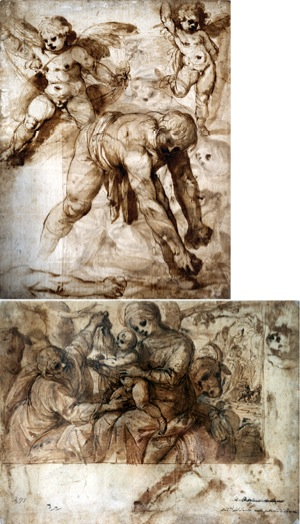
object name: Drawing and Watercolor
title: Studies of a Figure Bending Over, Two Putti, and an Arm (recto); Rest on the Flight into Egypt (verso)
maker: Cesare Rossetti (Italian, active c. 1593–1623/42)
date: 1596/97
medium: Pen and brown iron-gall ink, with brush and brown wash, over black chalk (recto), and pen and brown iron-gall ink, with brush and brown wash, over touches of black chalk, heightened with lead white gouache (partially oxidized) (verso), on ivory laid paper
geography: Italy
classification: drawings (visual works); paper; prints and drawing